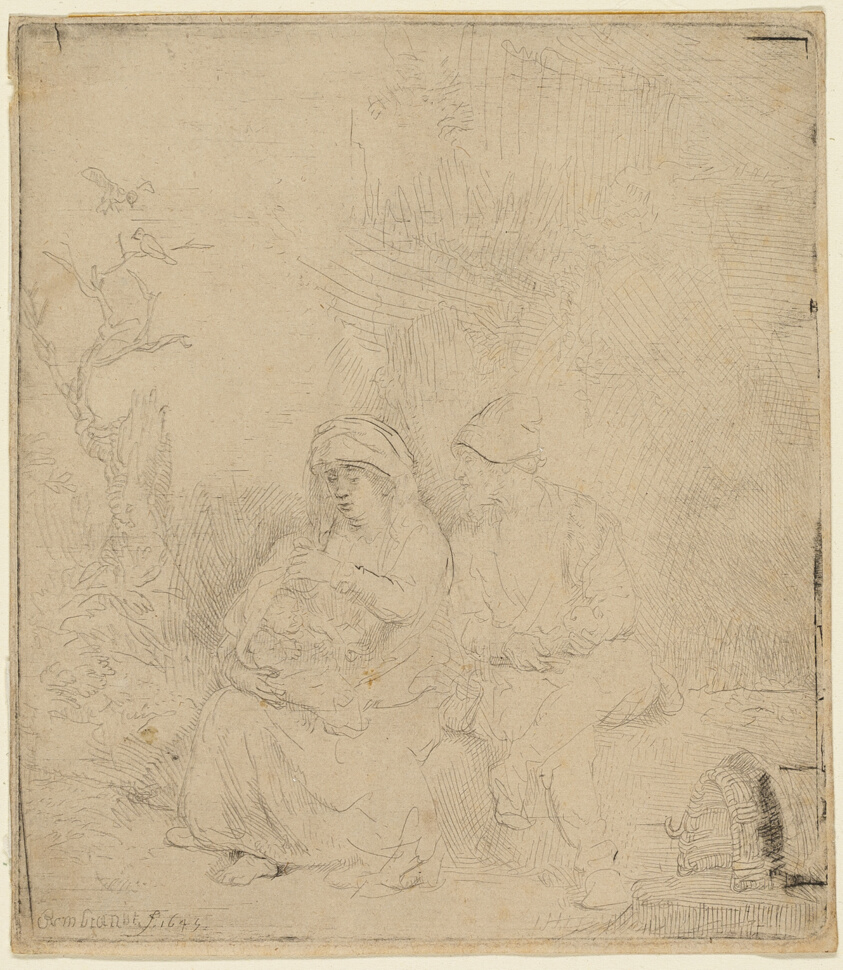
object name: Print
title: The Rest on the Flight into Egypt: Lightly Etched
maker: Rembrandt van Rijn (Dutch, 1606-1669)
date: 1645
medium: Etching with drypoint on buff paper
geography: Holland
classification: etching; print; prints and drawing; paper